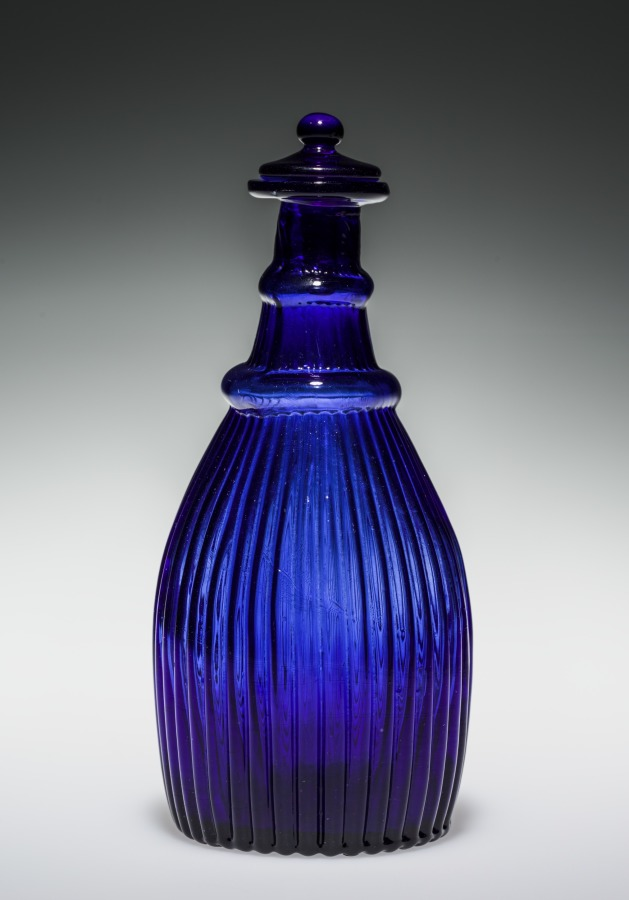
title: Bottle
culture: America, Massachusetts, possibly Sandwich, 19th century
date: 1825–1850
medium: glass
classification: Glass